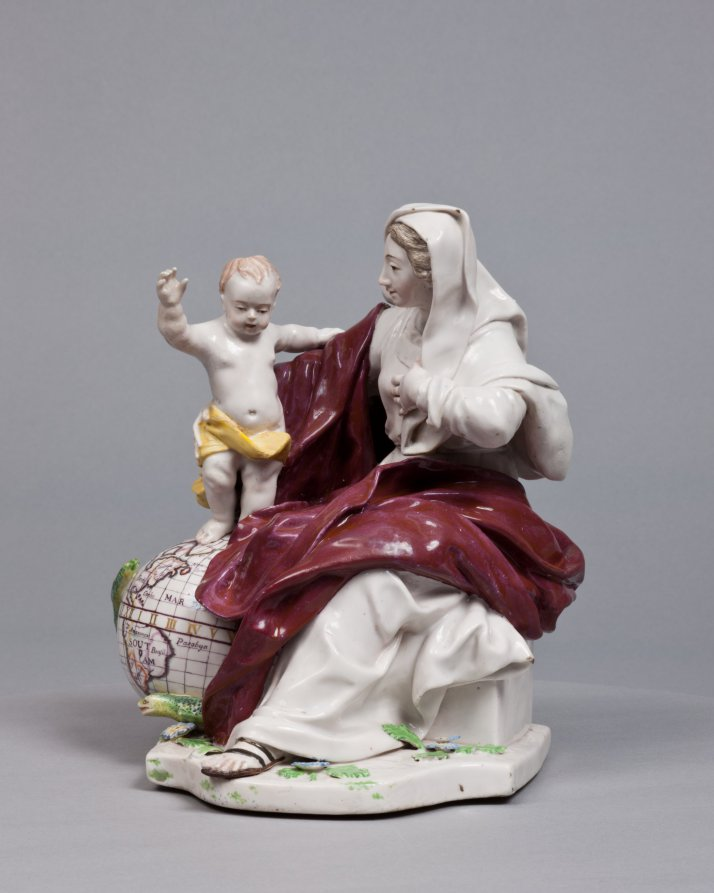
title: Madonna and Child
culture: England, Chelsea, 18th century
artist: Chelsea Porcelain Factory (Britain, London, 1745–84)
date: c. 1755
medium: porcelain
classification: Ceramic